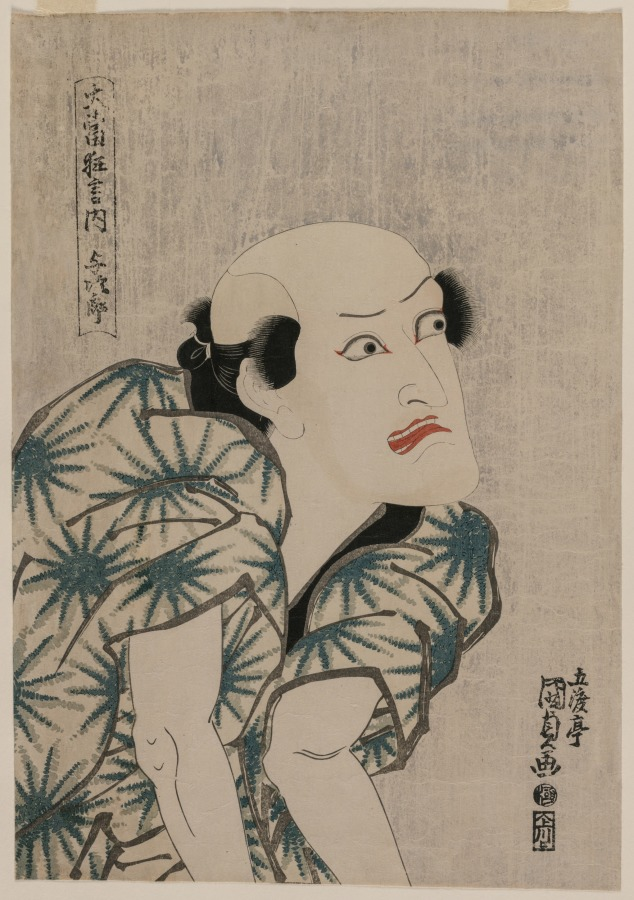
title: Nakamura Utaemon III as the Monkey Trainer Yojiro (from the series Famous Kabuki Plays)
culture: Japan, Edo period (1615–1868)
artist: Utagawa Kunisada (Japanese, 1786–1865)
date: mid-1810s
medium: color woodblock print, with mica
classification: Print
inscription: Signature: Gototei Kunisada ga. Publisher: Kawaguchi Uhei (Kawaguchi, emblem). Censorship Seal: kiwame.